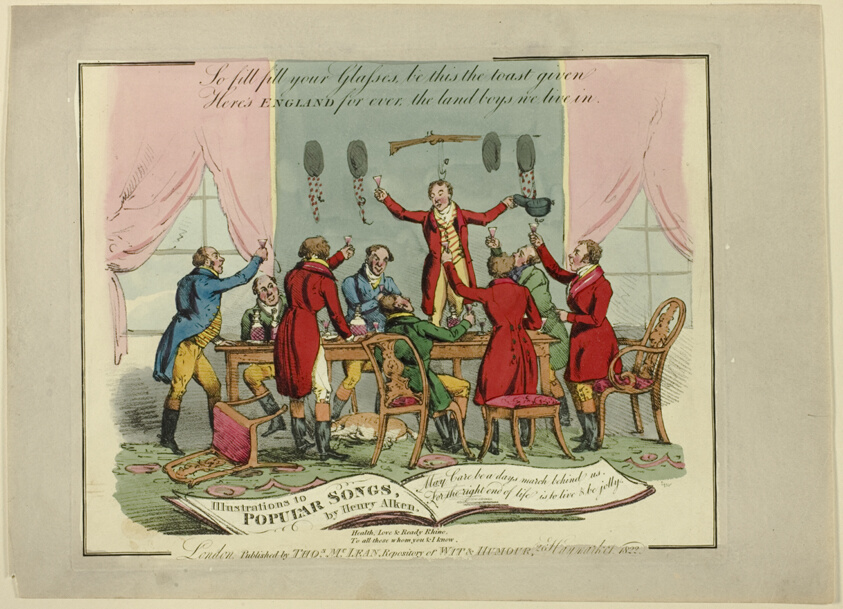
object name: Print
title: Plate from Illustrations to Popular Songs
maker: Henry Alken (English, 1785-1851); published by Thomas McLean (English, active 1790-1860)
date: 1822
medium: Soft ground etching with hand-coloring and aquatint on paper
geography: England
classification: etching; print; prints and drawing